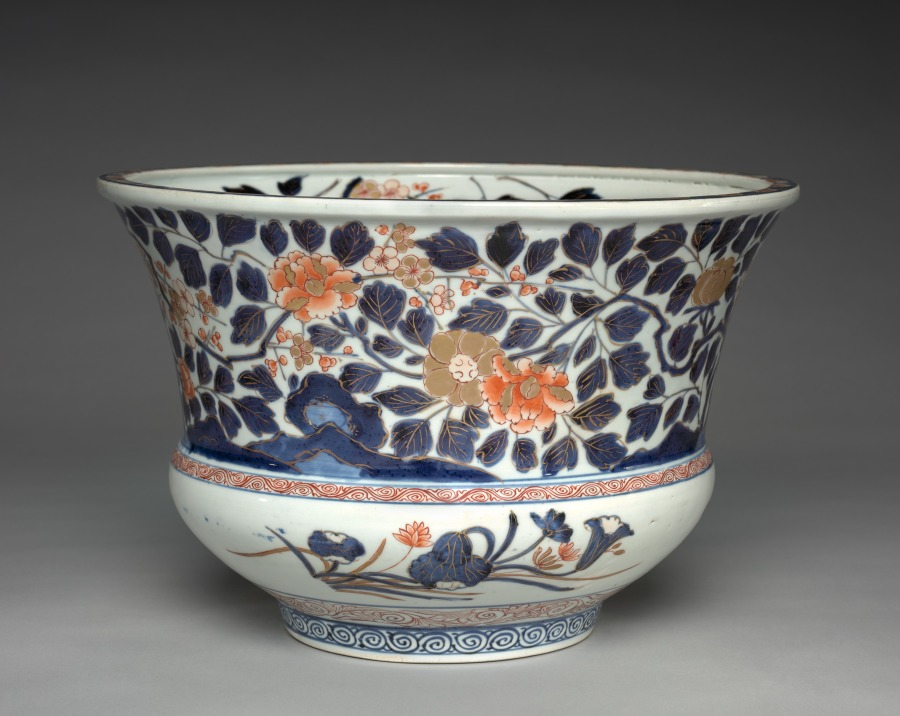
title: Vase (Imari ware)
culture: Japan, Edo period (1615–1868)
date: c. 1700s–1800s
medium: underglaze blue with overglaze red porcelain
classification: Ceramic